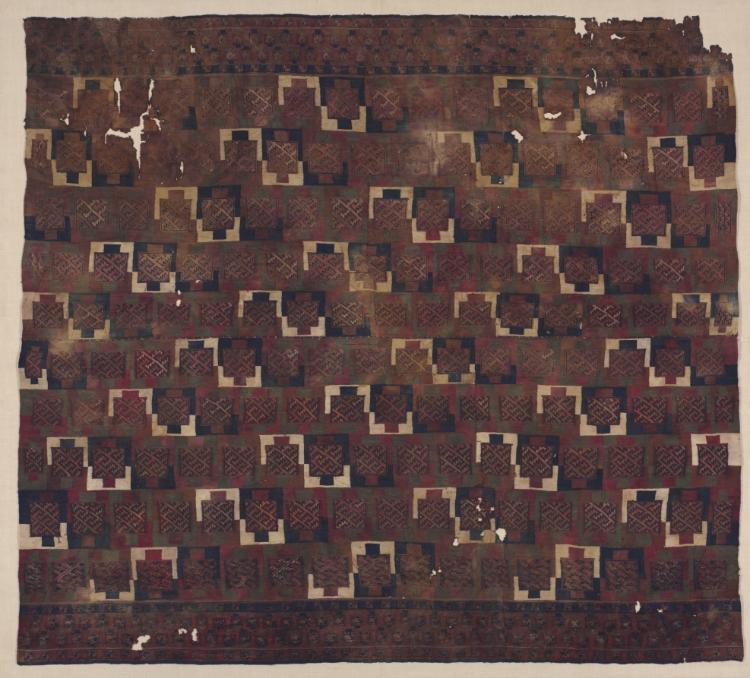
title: Dress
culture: Peru, South Highlands or South Coast, Chuquibamba style, 12th-16th century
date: c. 1100–1532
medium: camelid fiber; tapestry and complementary-weft weave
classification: Textile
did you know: This wrap-around textile is meant for a female; the upper border folds over the bodice.